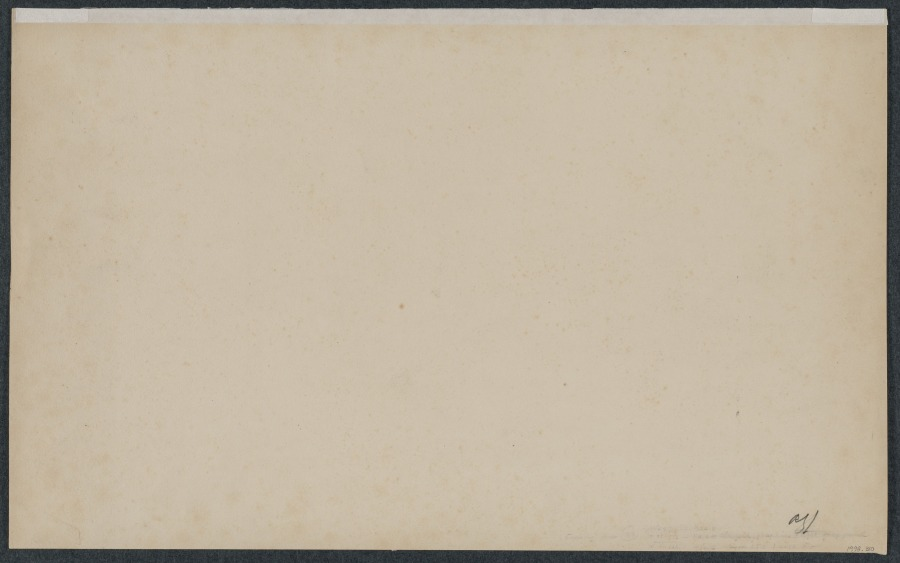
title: Port of Rouen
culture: France, 19th century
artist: Maxime Lalanne (French, 1827–1886)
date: 1884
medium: graphite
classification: Drawing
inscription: signed, lower right, in graphite: ROUEN. 1884 / Maxime Lalanne ; VERSO, lower right, in graphite: R[zl?] ; lower right, in graphite: [three lines of matting notations, partially erased]